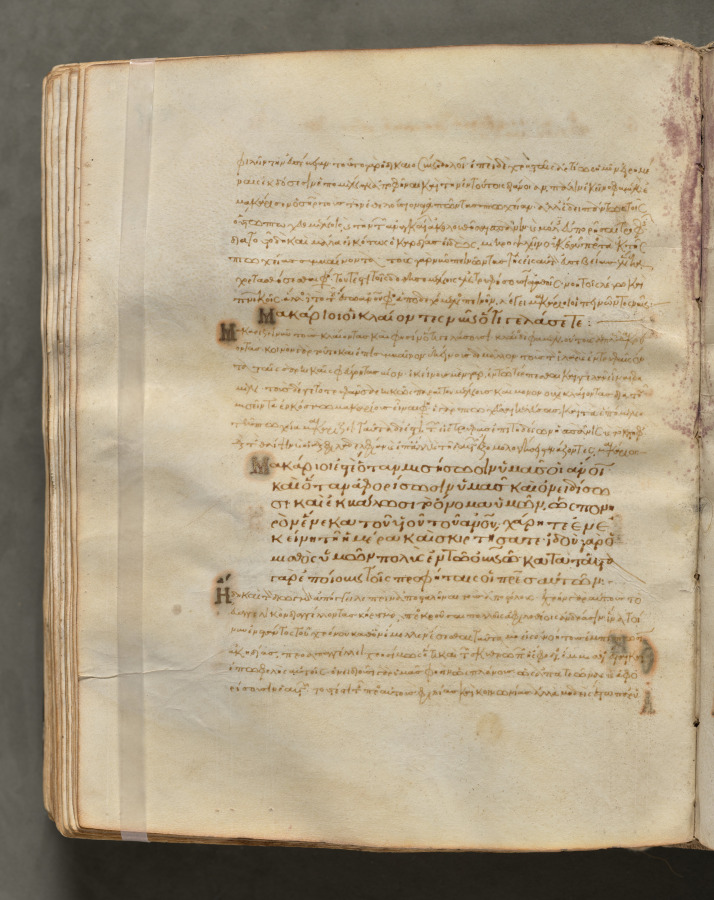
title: Text, folio 228 (verso), from a Gospel Book with Commentaries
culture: Byzantium, Constantinople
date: c. 1000–1100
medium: ink, tempera, and gold on vellum; leather binding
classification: Bound Volume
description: Each of the four gospels in this book opens on a page with brilliantly illuminated borders depicting the author of the text as well as birds-principally peacocks, symbols of the immortality of the soul-and fountains, representing the fountain of life and the salvation of the soul. This volume consists of 428 leaves with texts in Greek. Its level of sophistication suggests that it was probably written and decorated in a monastery in Constantinople.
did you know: Gospel Books were carried in procession through Byzantine churches.